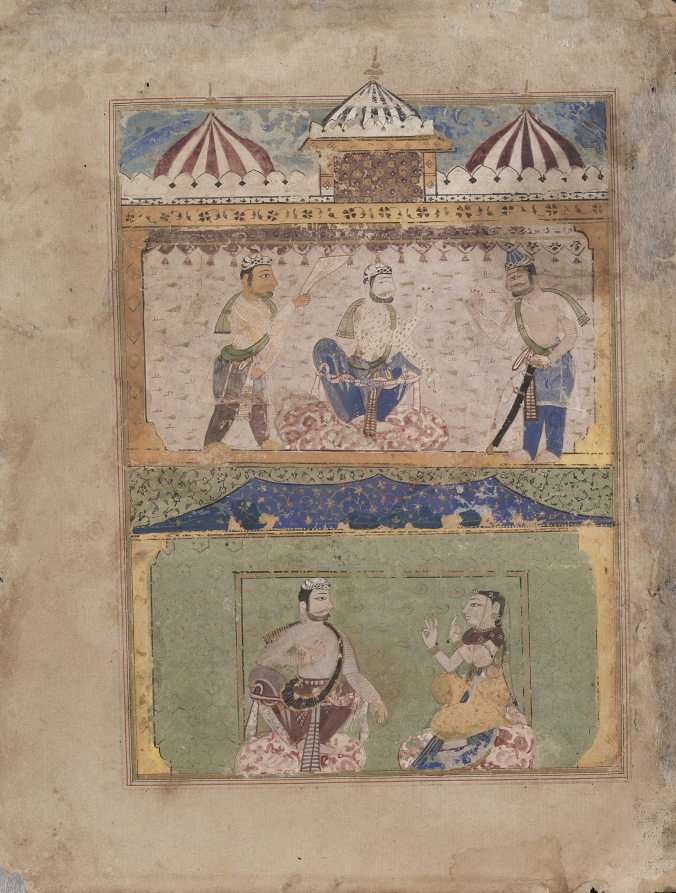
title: A traveler persuades Lorik to return home (top); Chanda objects (bottom), from a Chandayana (Story of Chanda)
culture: Sultanate India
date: c. 1540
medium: gum tempera, ink, and gold on paper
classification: Painting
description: Chanda is the heroine of a Sufi romance. The Sufis are a mystical branch of Islam whose followers cultivate love for the divine. This painting is from a dispersed manuscript of the Chandayana painted in a style that was an important source for Mughal painting. Its artists integrated Persian colors and delicate vine motifs with figures presented in profile, within flat, compartmentalized registers, which are horizontal divisions of space. The drama of their interactions is conveyed by means of animated gestures.